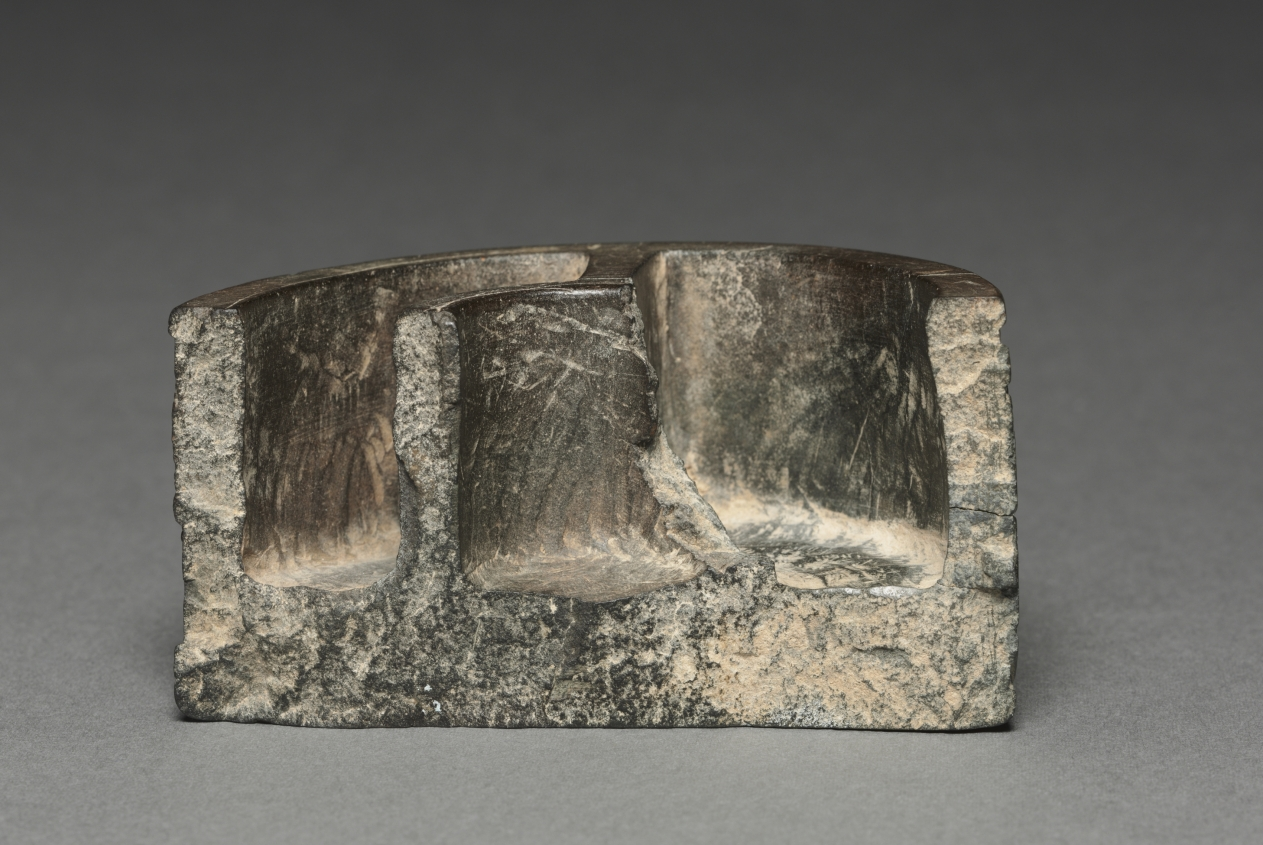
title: Banquet Pyxis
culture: Anatolia, Neo-Hittite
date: 800–750 BCE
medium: steatite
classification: Sculpture